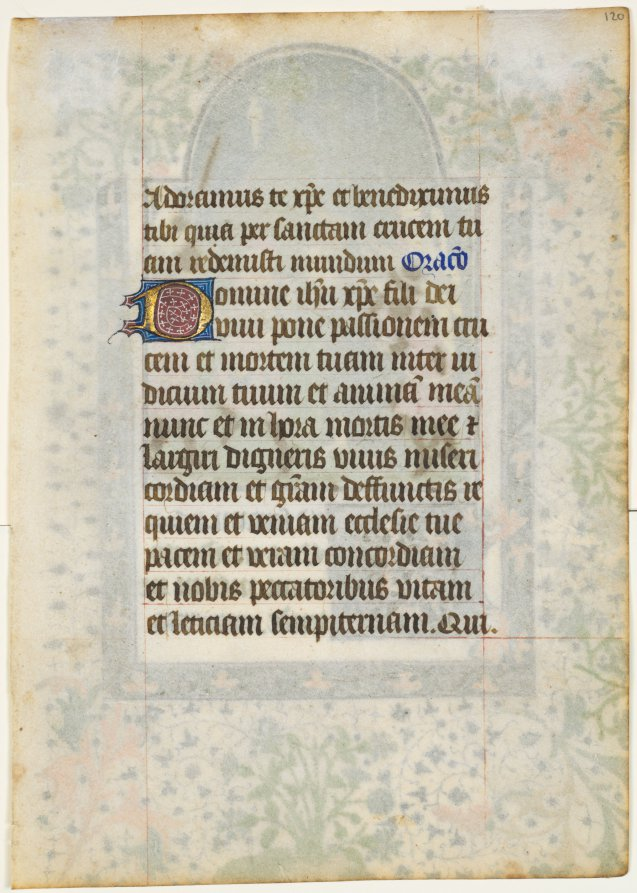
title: Leaf from a Book of Hours: Christ Carrying the Cross (Sext, Hours of the Cross)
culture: France, Brittany(?), 15th century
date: c. 1410–1420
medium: ink, tempera and gold on vellum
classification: Manuscript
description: Within books of hours, the Hours of the Cross normally received only one miniature, a Crucifixion, as its introduction. There are exceptions, however, and in some books of hours a Passion cycle of seven miniatures, one for each hour (except Lauds), might be found. The present leaf with its miniature of Christ Carrying the Cross would have been part of such a cycle of pictures in which it introduced the Hour of Sext (confirmed by the rubric, Ad Sextam). The composition shows Christ laboring to support the weight of the cross as he journeys to Calvary. The Virgin and Saint John appear at the far left as the group exits the gates of Jerusalem. In the background, the body of Judas is seen suspended from a tree high upon a hill.